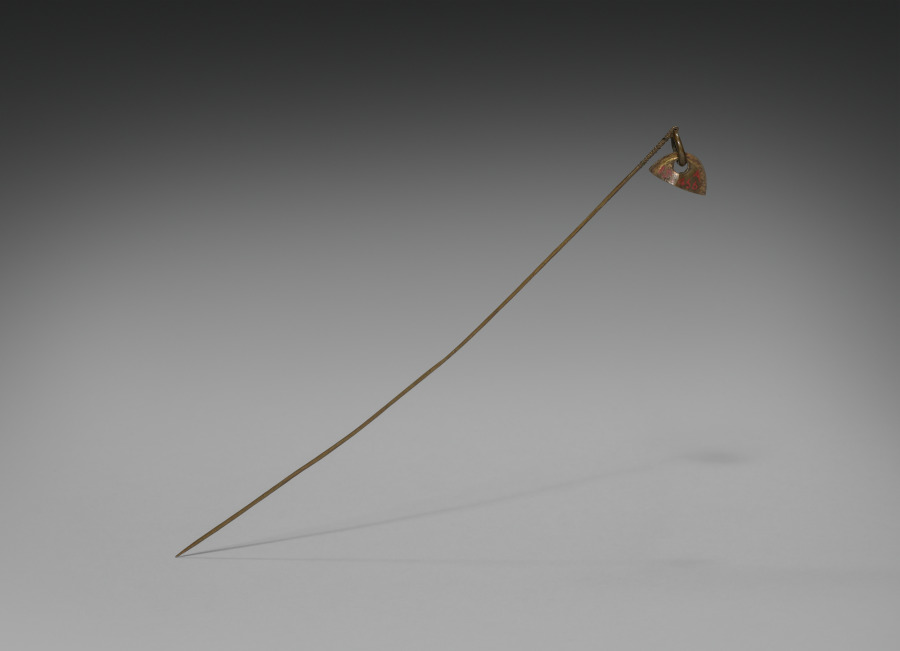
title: Pin for a Hat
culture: Africa, Central Africa, Democratic Republic of the Congo, Kuba-style maker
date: early 1900s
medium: Metal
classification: Garment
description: Titled Kuba men and prominent women wear the laket, a small ornate dome-shaped hat. An essential fashion item of adult men in good social standing, it focuses special attention on the head as a significant marker of individual identity, ethnic affiliation, status, and role in society. This prestige object is secured on the crown of the head with a large metal pin like this example that pierces through the hat onto a section of hair.